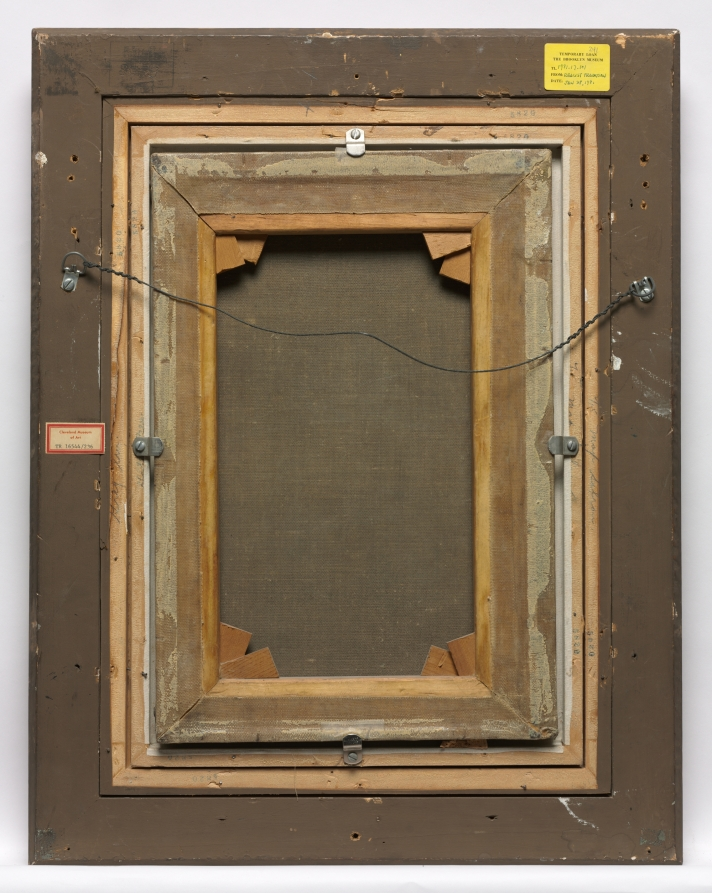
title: The Veteran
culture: France, 19th Century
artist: Marie-François Firmin-Girard (French, 1838–1921)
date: 1870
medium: oil on canvas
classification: Painting